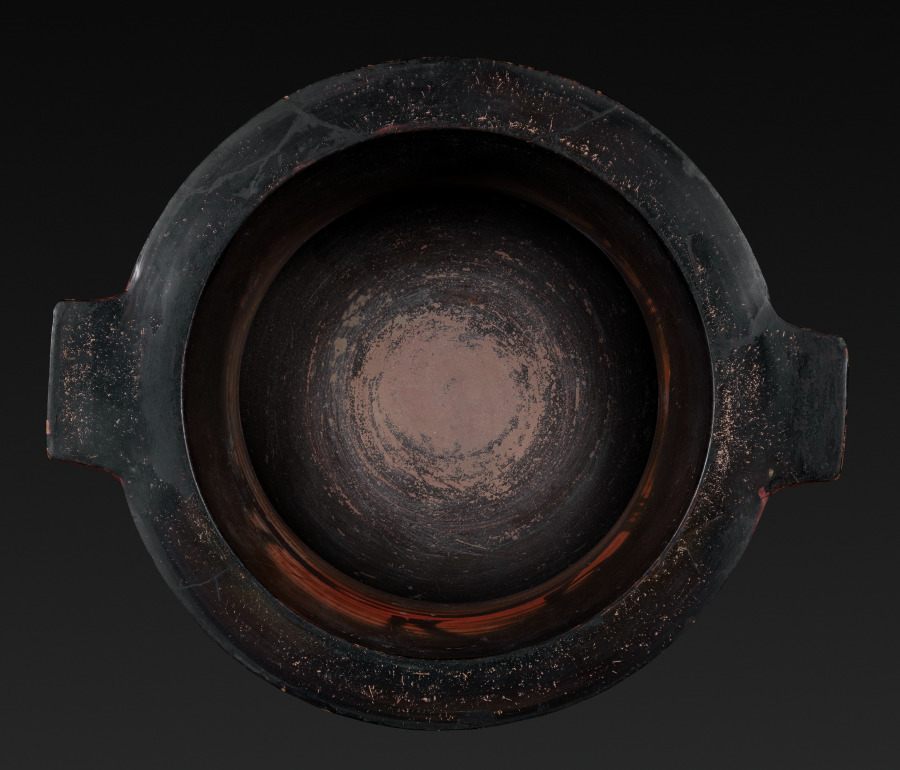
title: Red-Figure Column Krater (Mixing Vessel): Komos (Revel)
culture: Greek, Attic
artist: attributed to Pig Painter (Greek, Attic, active c. 480–460 BCE)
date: 470–460 BCE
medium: ceramic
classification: Ceramic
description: Used for mixing wine and water at a symposium (or drinking party), this column-krater speaks to the perils and pleasures of drinking. On one side, a bearded man holding a staff and a drinking cup leans forward, a red stream of vomit falling from his mouth. Before him is a nude young boy, holding a tortoiseshell lyre and a basket or pail. On the other side, a young man dances, holding a deep cup and wearing just one boot. On the neck above him, scratched in large letters, is the name SIMONOS, probably indicating that the vase once belonged to someone named Simon.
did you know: The bearded man on this vase is vomiting—perhaps a humorous warning against over imbibing.